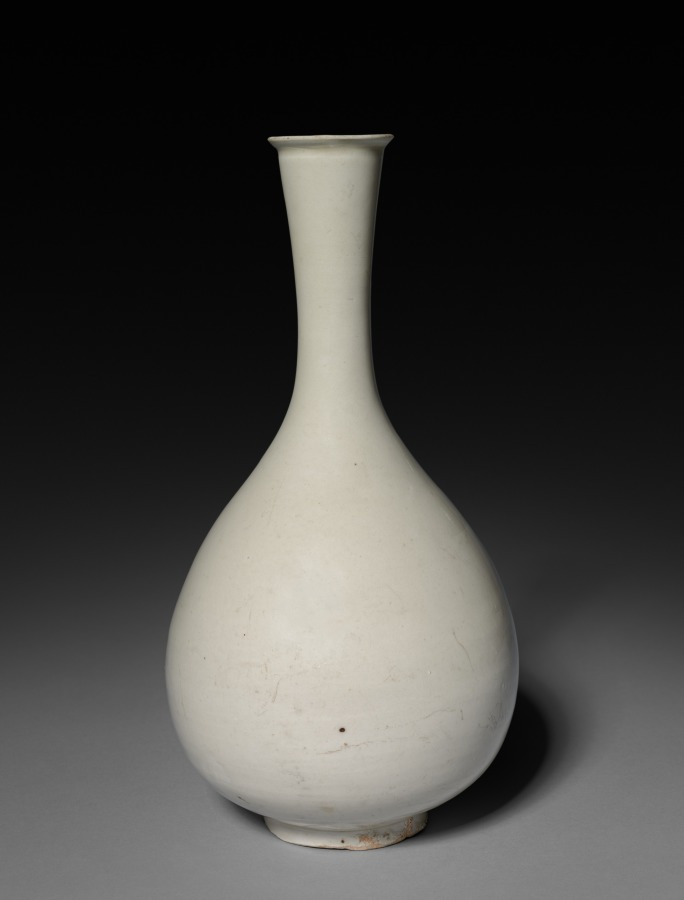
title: Bottle Vase: Ding ware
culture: China, Jin dynasty (1115-1234)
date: 12th Century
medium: glazed white porcelain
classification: Ceramic